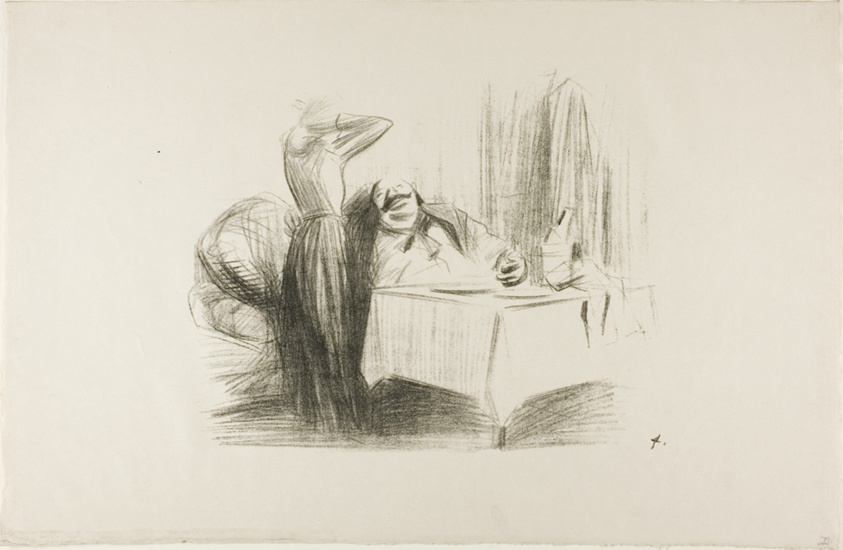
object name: Print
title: Private Dining Room Scene (horizontal plate)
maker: Jean Louis Forain (French, 1852-1931)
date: c. 1905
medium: Lithograph on off white wove paper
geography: France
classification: lithograph; print; prints and drawing